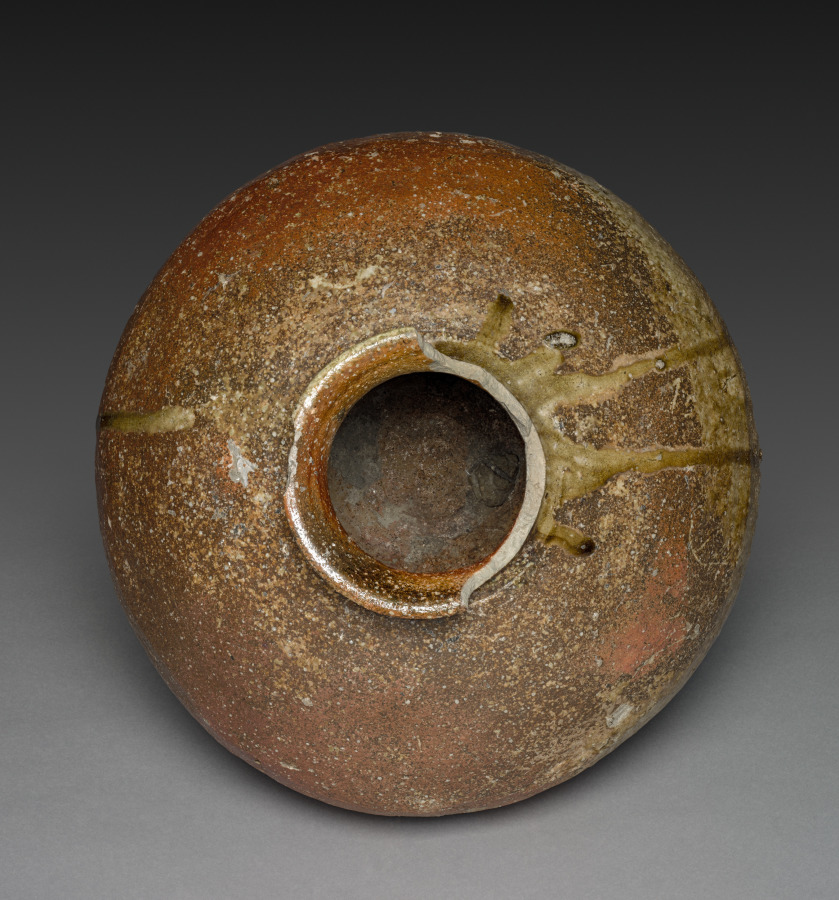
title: Storage Jar (Tsubo)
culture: Japan, Muromachi period (1392–1573)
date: 1400s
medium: Stoneware with natural ash glaze (Shigaraki ware)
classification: Ceramic